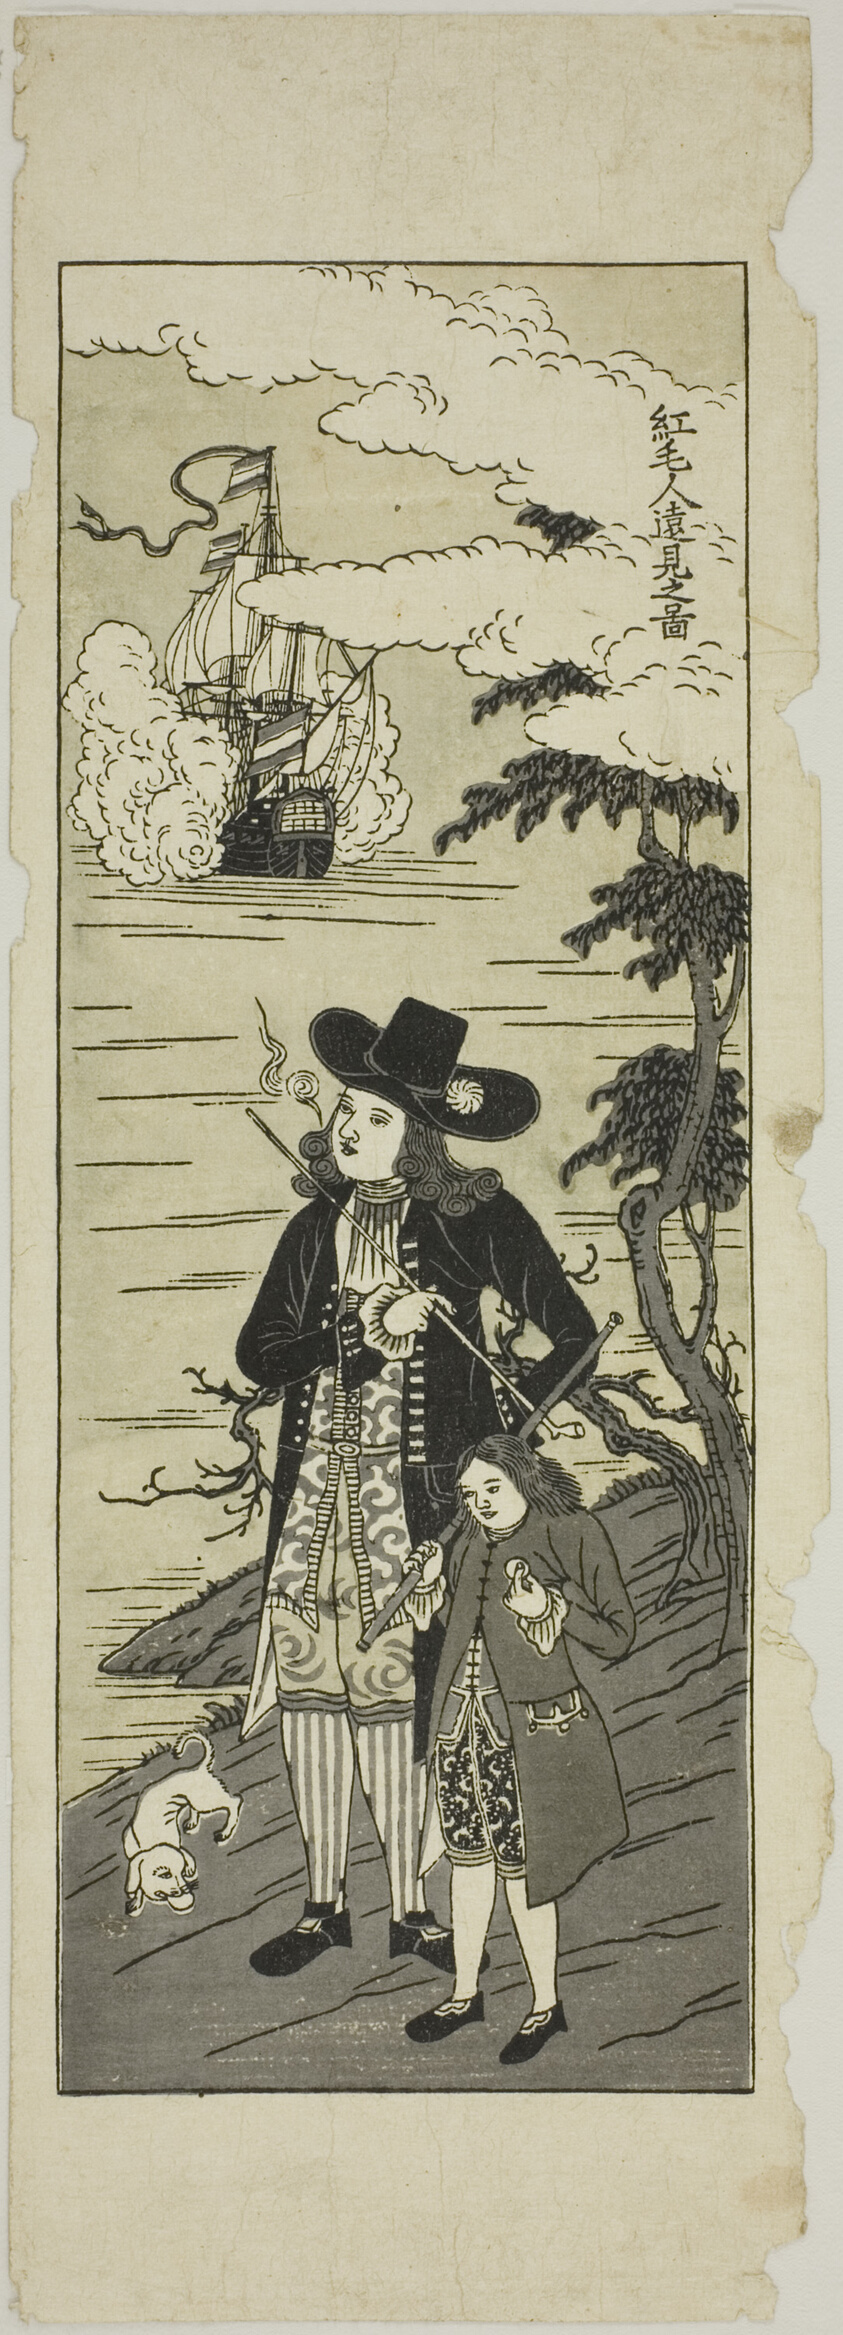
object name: Print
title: Hollander Looking Far Away 紅毛人遠見之図 (Komojin enken zu)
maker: Unknown Artist (Japanese, date unknown)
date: late 18th century to mid 19th century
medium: Woodblock print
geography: Japan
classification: woodblock print; print; asian art